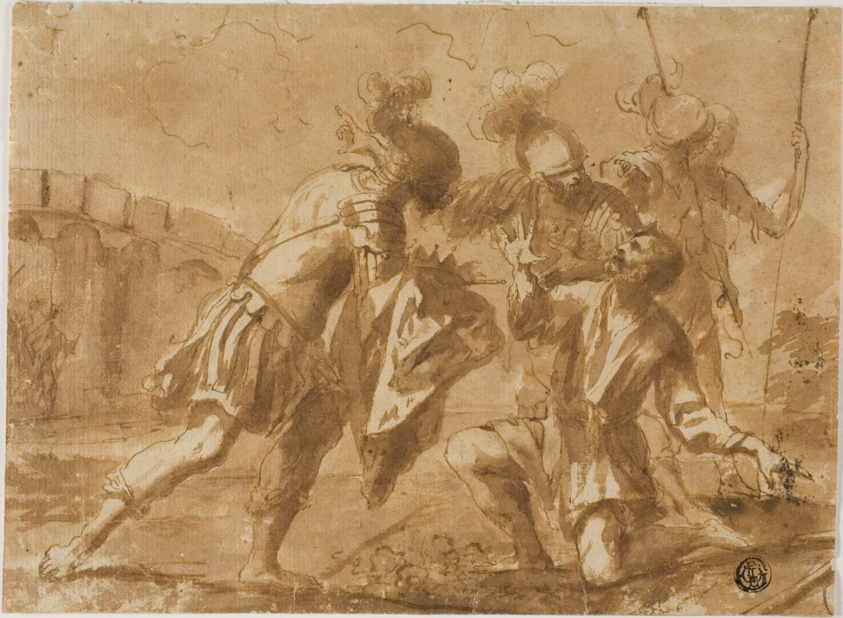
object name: Drawing and Watercolor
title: Cincinnatus Called from the Plough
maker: Follower of Guercino (Italian, 1591-1666)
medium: Pen and brown ink, with brush and brown wash, on ivory laid paper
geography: Italy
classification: ink or chalk wash; drawings (visual works); prints and drawing